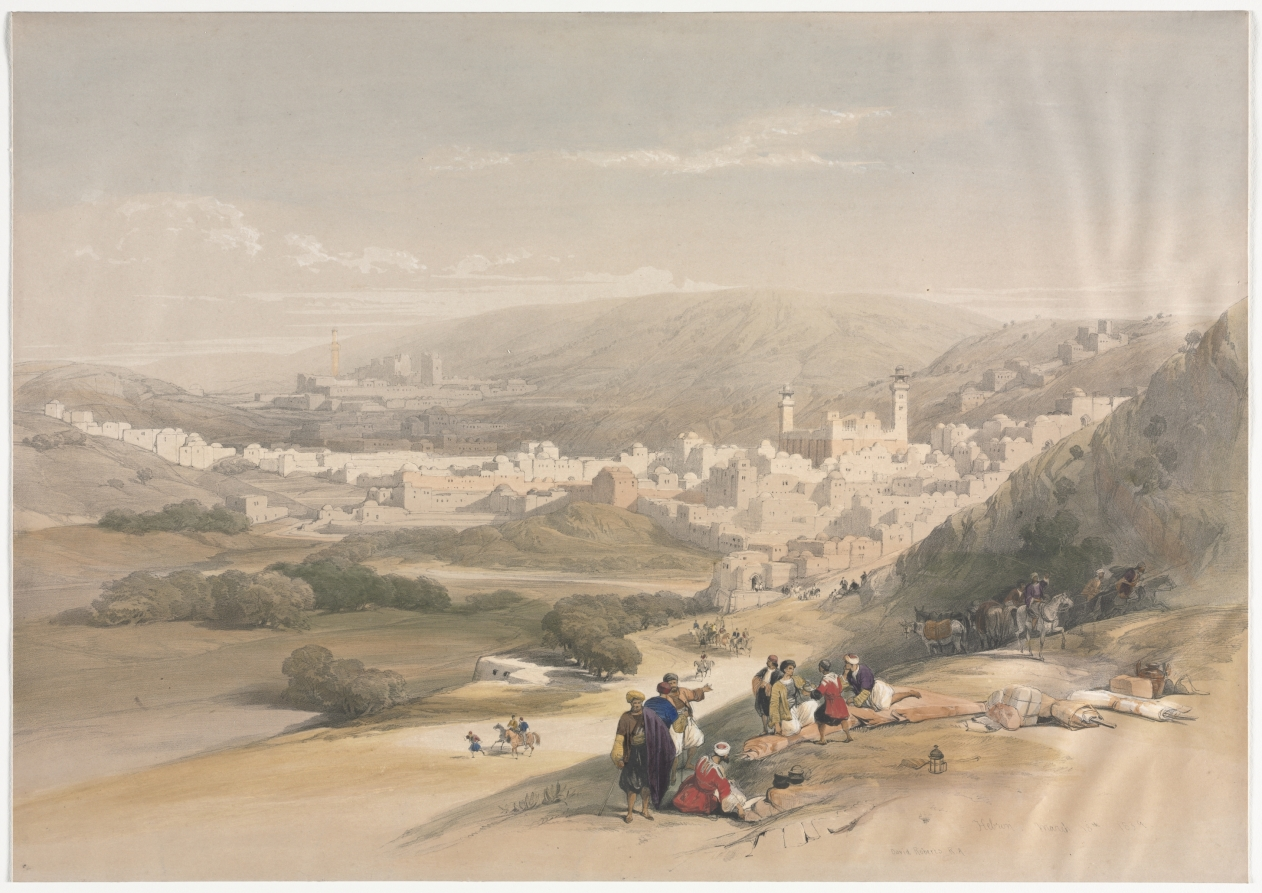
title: Hebron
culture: England, 19th century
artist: David Roberts (Scottish, 1796–1864)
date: 1839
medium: color lithograph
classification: Print